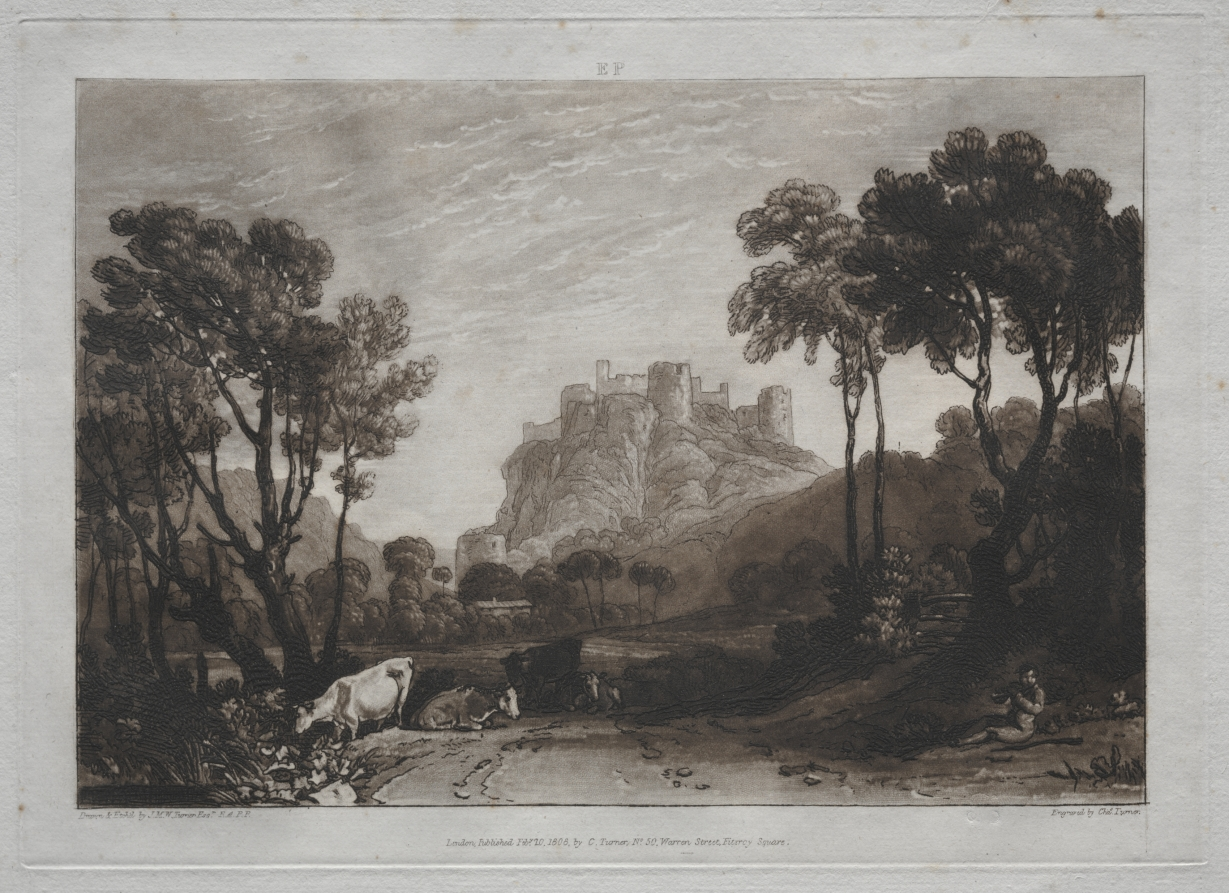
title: Liber Studiorum: The Castle above the Meadows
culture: England, 19th century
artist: Joseph Mallord William Turner (British, 1775–1851)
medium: etching and mezzotint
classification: Print